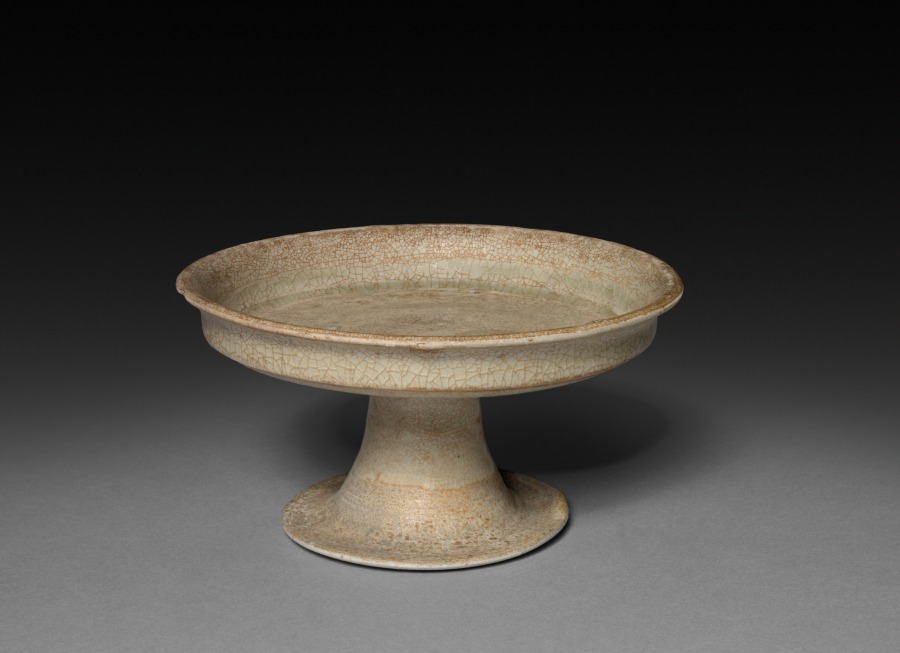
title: Stem Dish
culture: China, Tang dynasty (618-907)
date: 600s-700s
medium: glazed cream-white stoneware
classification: Ceramic